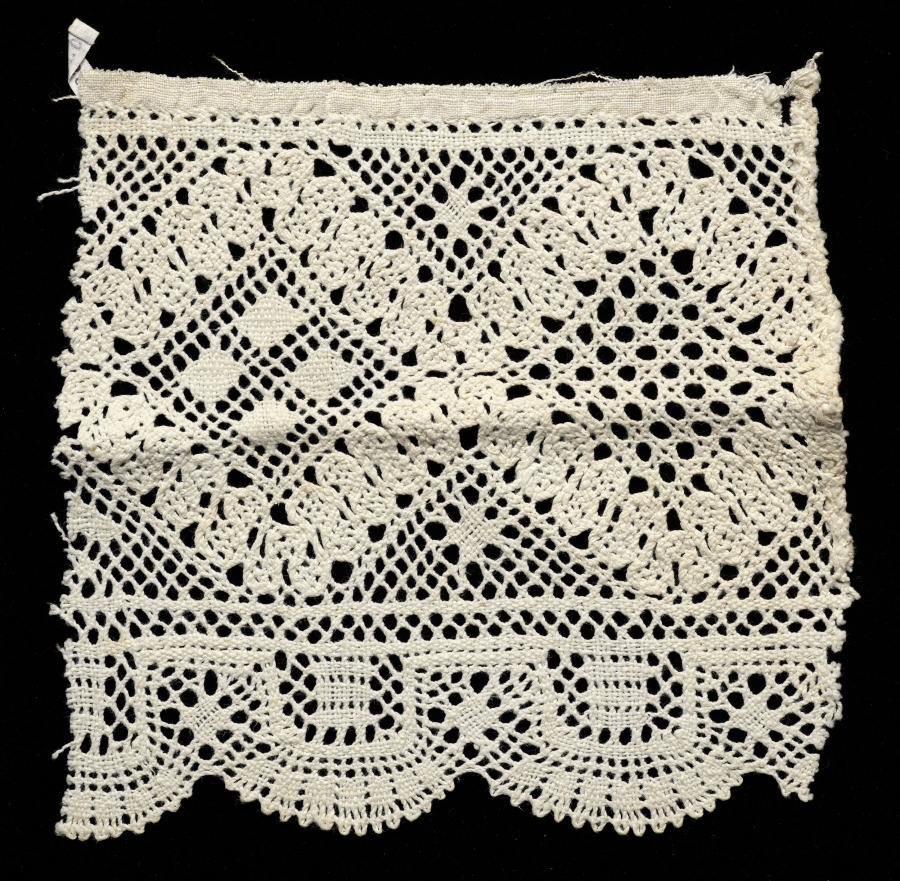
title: Fragment of a Lace Flounce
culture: Spain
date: 1800s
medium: Bobbin lace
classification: Lace